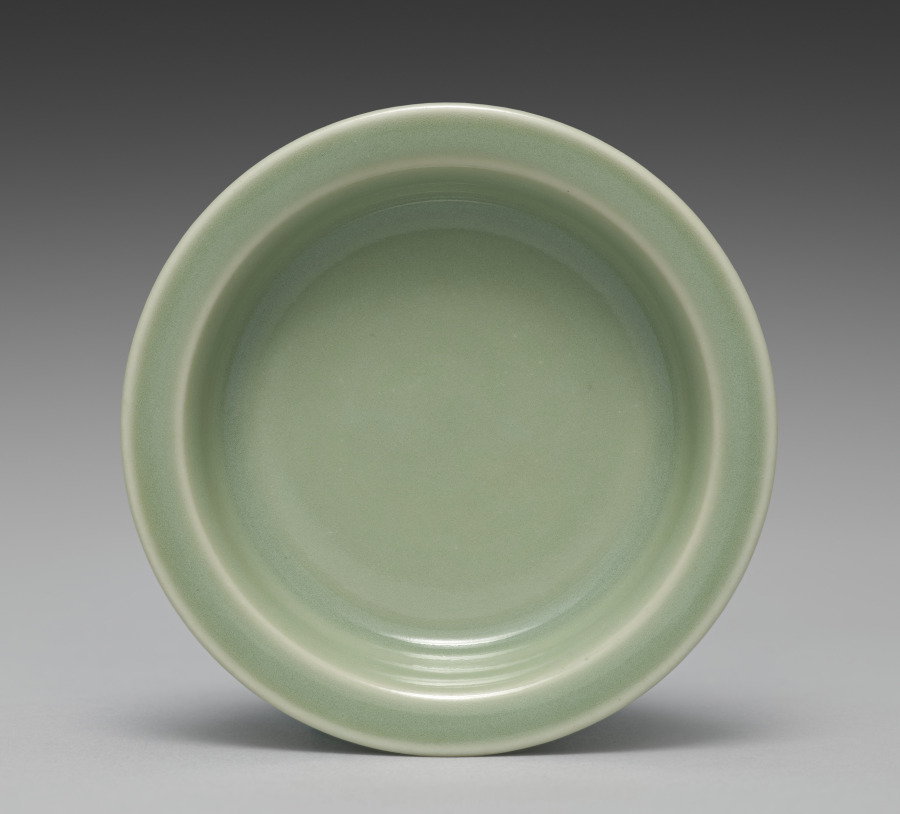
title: Saucer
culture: Japan, Meiji period (1868–1912)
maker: Seifū Yohei III (Japanese, 1851–1914)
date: 1893–1914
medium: One from a set of ten dishes; porcelain with green glaze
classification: Ceramic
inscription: 清風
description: Yohei III’s main output for his sophisticated clientele was in the form of tea sets and dining sets. He created a range of dishes in green glazes. He often produced in pairs, sets of five, or sets of ten. For this set of ten small dishes in a simple, round form that emphasizes the glaze above all, the box lid designates the piece as seiji, or green-glazed porcelain, using a general term for the extensive palette of green glazes often called celadon in English. The box lid further identifies the dishes themselves as tōchō, literally “bean-sized saucers,” a size that makes them suitable for dipping sauces.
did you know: The ten dishes in this set are stored in stacks of five in a two-compartment box.